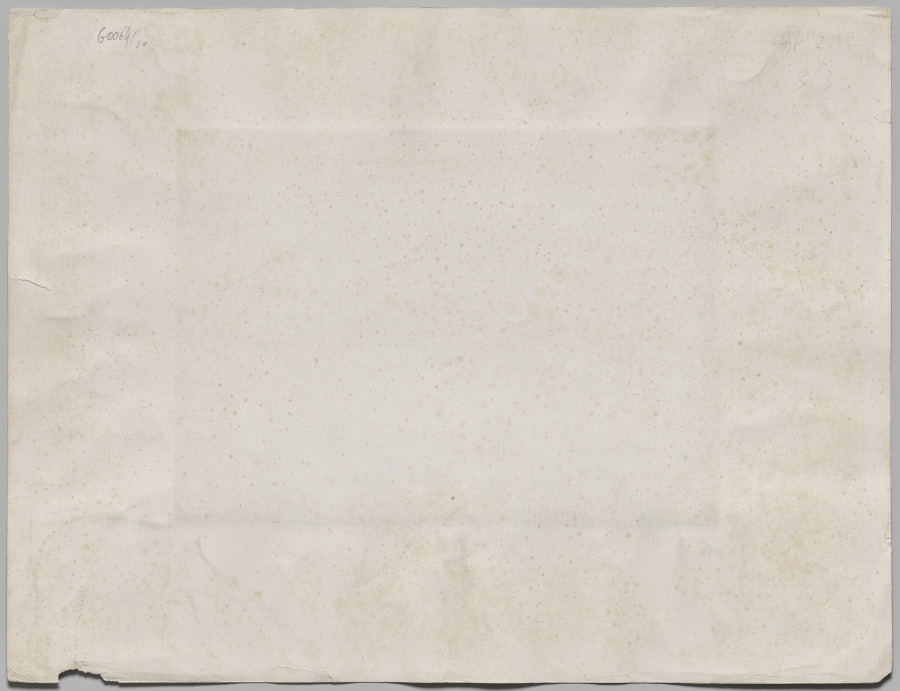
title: Temple of Athene Nike. Venus Victrix—Wingless Victory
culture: Greece, 19th century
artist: Dimitrios Constantin (Greek, 1820–1900)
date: c. 1850s–60s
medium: albumen print from collodion negative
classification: Photograph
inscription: In black in, center of image, recto: “D. Constantin d’Athéns”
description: Here we see a monument of ancient Greece through the eyes of a nineteenth-century Greek. This temple on the Acropolis in Athens, completed around 420 BC, was dedicated to the goddesses Athena and Nike, both of whom represented being victorious in war.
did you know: Dimitrios Constantine, who opened a studio in 1858, was probably the second professional photographer in Greece.